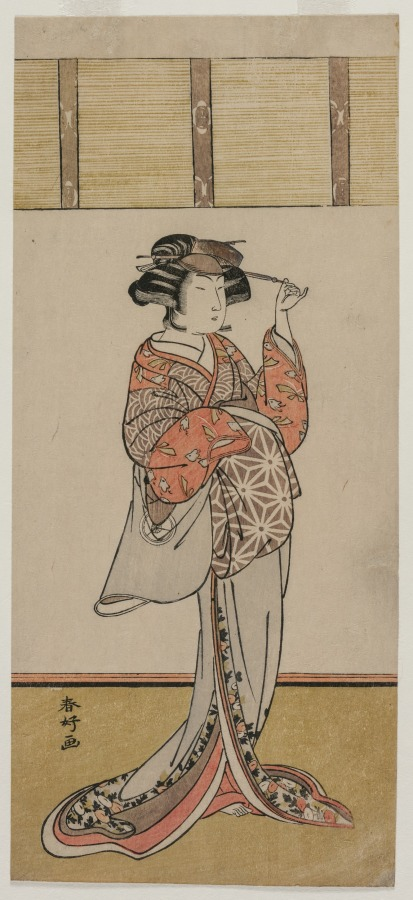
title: Iwai Hanshiro IV as Oiso no Tora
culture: Japan, Edo period (1615–1868)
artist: Katsukawa Shunkō (Japanese, 1743–1812)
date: c. mid-1770s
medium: color woodblock print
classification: Print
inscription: Signature: Shunko ga